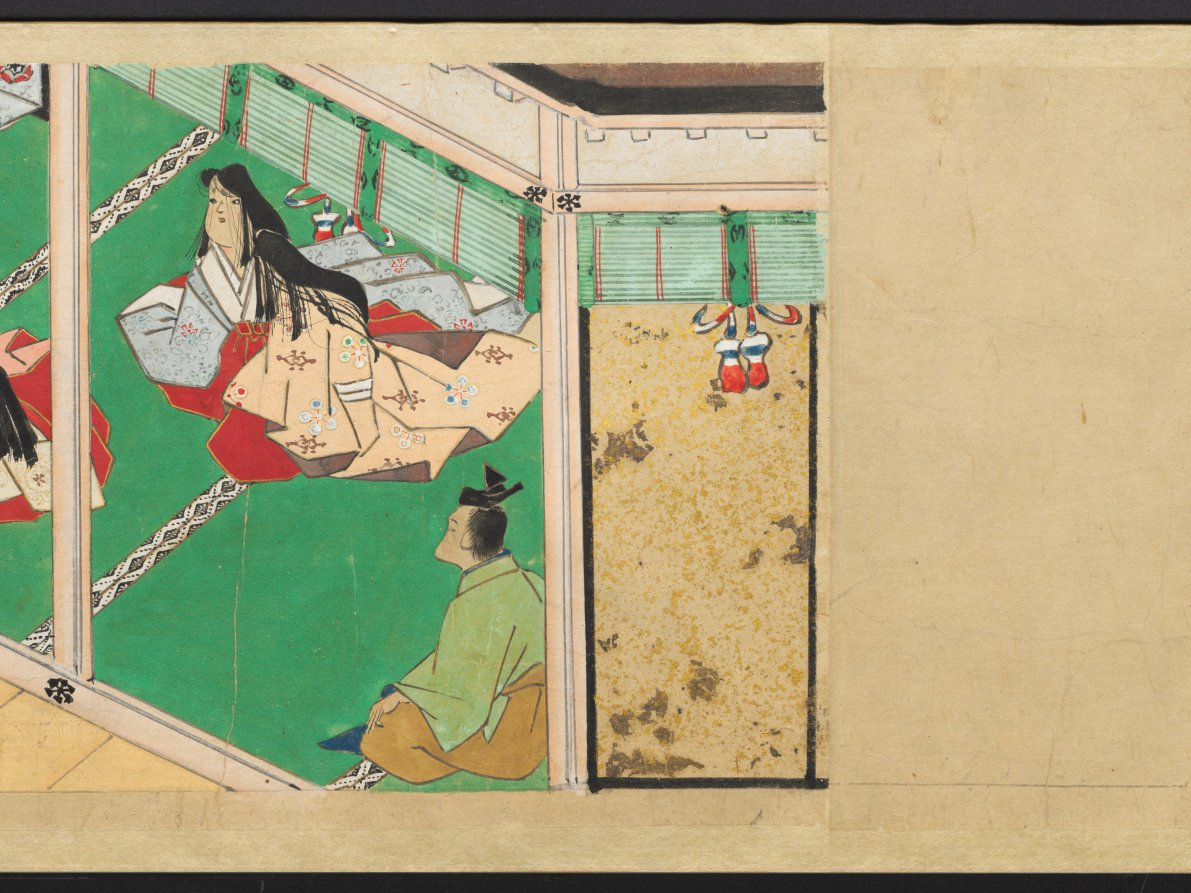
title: The Saltmaker's Story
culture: Japan, Edo period (1615–1868)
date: early 1600s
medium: One of a pair of handscrolls; ink, color, and gold on paper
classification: Painting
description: Once read and copied by girls at New Year’s celebrations and included in dowries, The Saltmaker’s Story is a rags-to-riches tale in which daughters are gifts from the gods. Despite his simple outlook, the main character progresses from humble roots as an associate at Kashima Shrine to the elite status of grandfather of the emperor through the intervention of the Kashima deity. The Saltmaker’s Story is traditionally presented in a set of three scrolls, but the text of this set has been removed by a previous owner, who remounted the illustrations as a pair. The paintings of this one take us from right to left through the first half of the tale.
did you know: This handscroll originally had texts before its paintings, but the texts were removed.